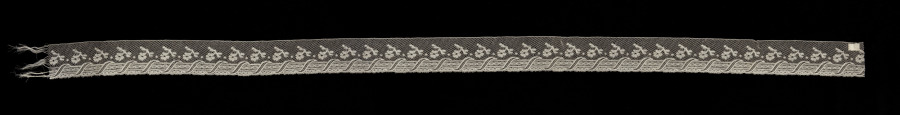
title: Lace Edging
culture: France, Valenciennes or Flanders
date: 1900–1935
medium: Linen: bobbin lace (Valenciennes)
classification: Lace